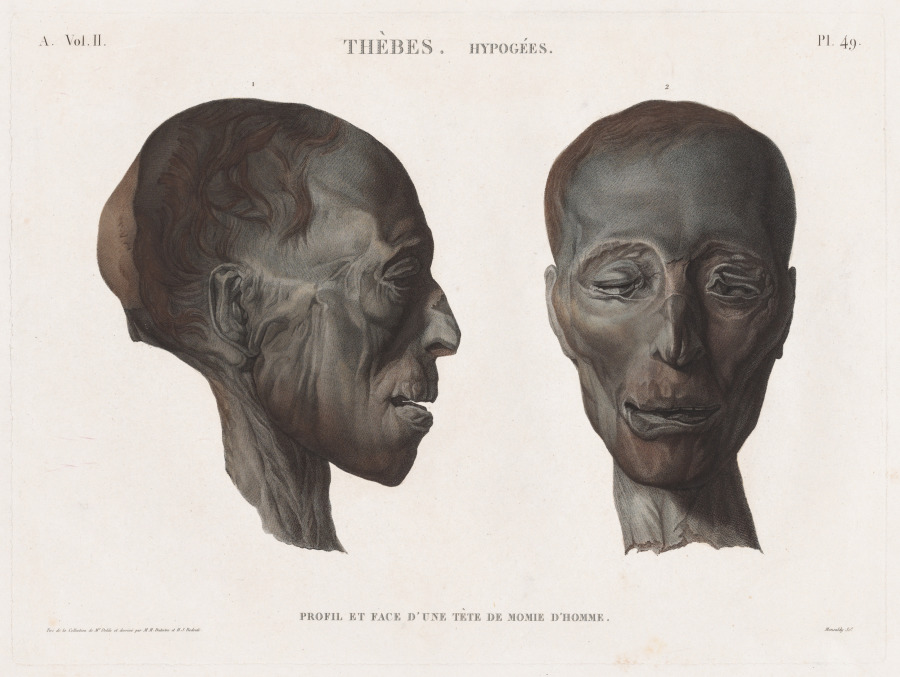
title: Description of Egypt: Thebes. Hypogees Vol. II, Pl. 49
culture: France, 19th century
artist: Antoine Maxime Monsaldy (French, 1768–1816)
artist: after André Dutertre (French, 1753–1842)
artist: after Henri Joseph Redouté (French, 1766–1853)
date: c. 1812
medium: etching, hand-colored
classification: Print